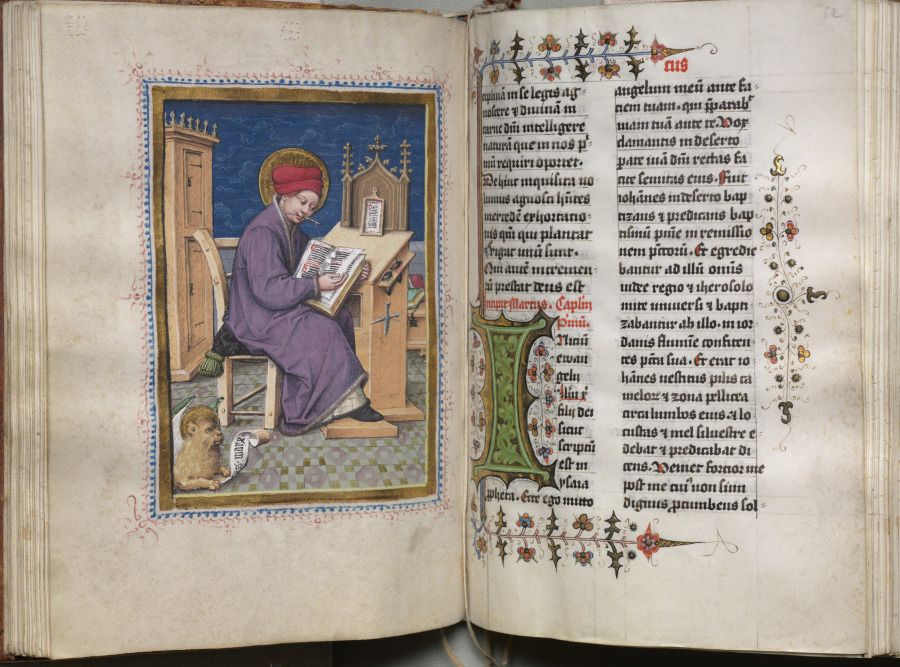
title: Gospel Book with Evangelist Portraits: Decorated Initial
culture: Germany, Middle Rhine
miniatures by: Master of the House-Book (German, c. 1470–1500)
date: c. 1480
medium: ink, tempera, and gold on vellum; original blind stamped leather binding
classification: Bound Volume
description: The four gospels are preceded by a full-page portrait miniature of the appropriate evangelist. Per tradition, they are represented as contemporary scribes surrounded by all the tools of their trade—ink pots, quill pens, and penknives. The anonymous illuminator of these miniatures, called the Hausbuch Master, is known primarily for an album of lively drawings as well as some 90 copper engravings now in Amsterdam. He was also apparently a panel painter of some distinction. The skillful pen work, tracery, and vine scrolls, as well as the large initials, are the work of other artists. The binding is original.